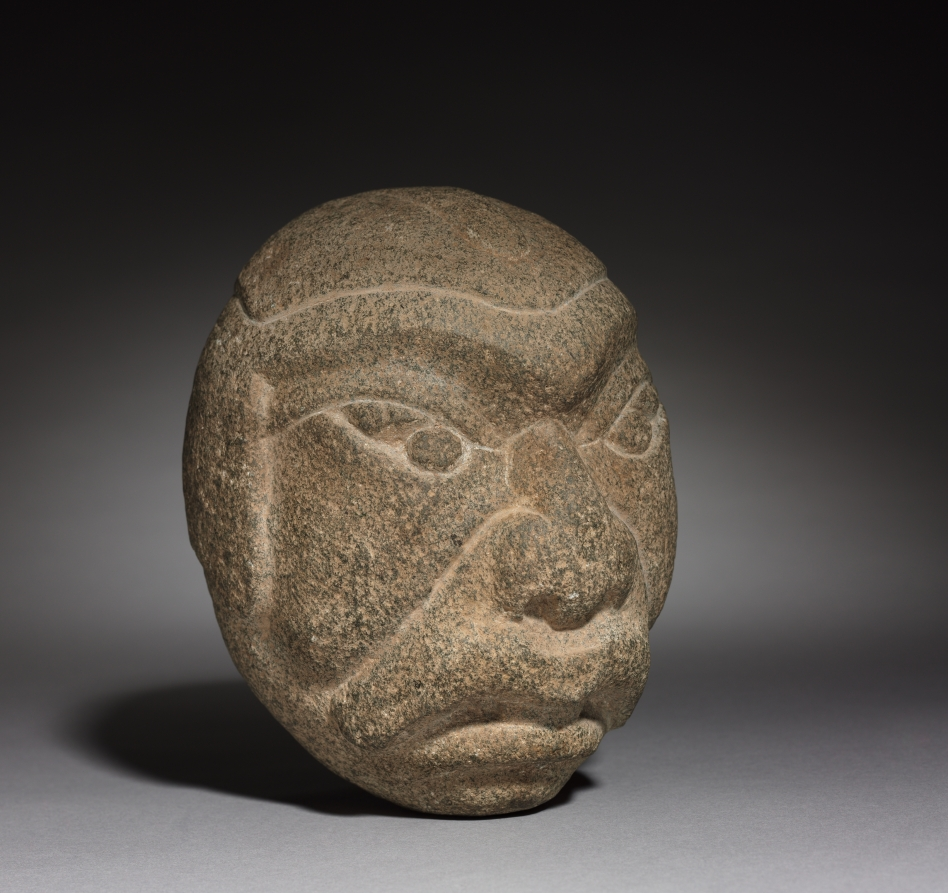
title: Head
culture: Mesoamerica, Mexico, Olmec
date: 1200–300 BCE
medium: stone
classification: Sculpture